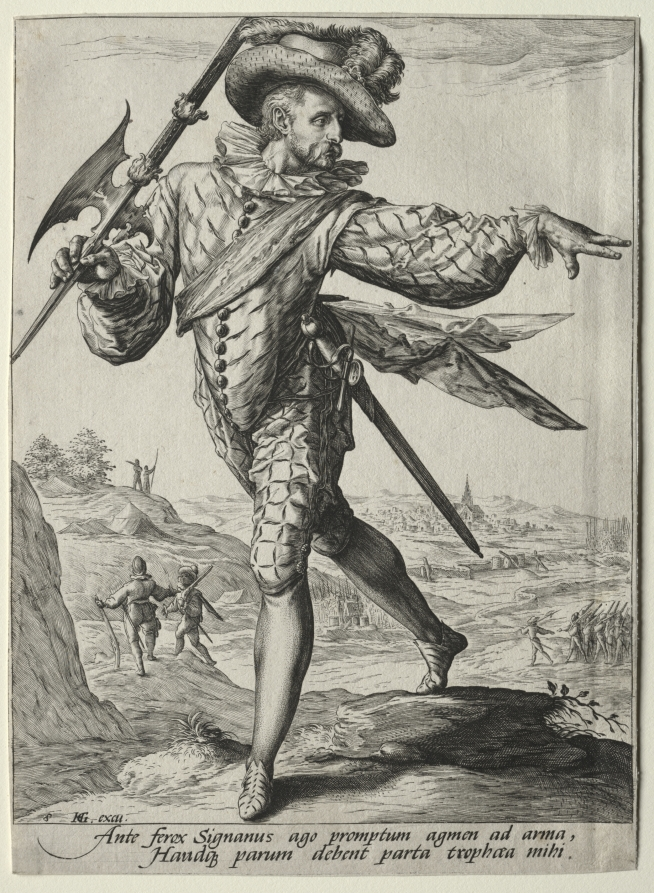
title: Officers and Soldiers of the Bodyguard of Emperor Rudolf II: Sergeant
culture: Netherlands, 16th century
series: Soldiers and Officers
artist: Jacob de Gheyn II (Netherlandish, 1565–1629)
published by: Hendrick Goltzius (Dutch, 1558–1617)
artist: after Hendrick Goltzius (Dutch, 1558–1617)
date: 1587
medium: engraving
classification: Print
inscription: lower left, in plate: 8 HG. excu. ; across bottom, in plate: Ante ferox Signanus ago promptum agmen ad arma, / Haudque parum debent parta trophæa mihi. ; VERSO, lower right, in graphite: 8